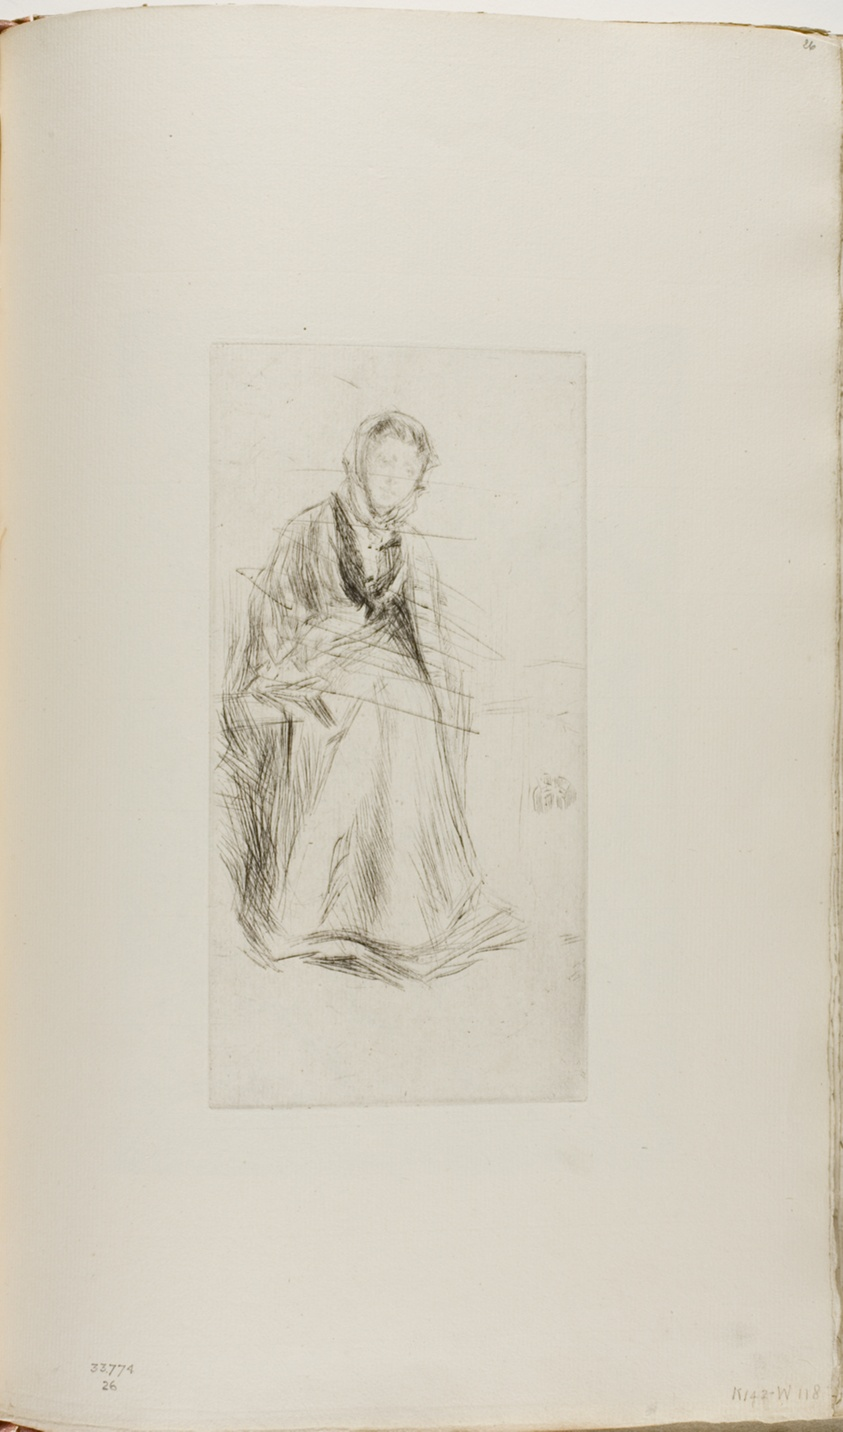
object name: Print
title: The Scotch Widow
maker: James McNeill Whistler (American, 1834-1903)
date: 1875/76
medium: Drypoint, with drypoint cancellation, in black ink on ivory laid paper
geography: United States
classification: drypoint; prints and drawing; book; print; paper